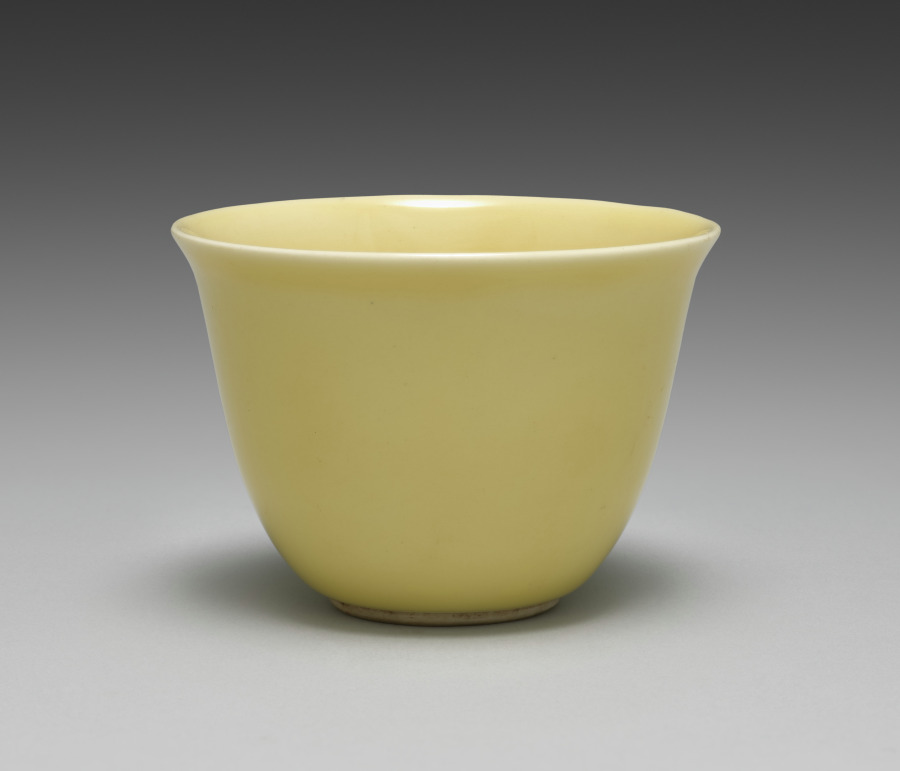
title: Cup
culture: Japan, Taishō period (1912–26) or Shōwa period (1926–89)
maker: Seifū Yohei IV (Japanese, 1872–1951)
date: 1914–46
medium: porcelain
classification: Ceramic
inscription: 清風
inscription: 清風造 【印】成山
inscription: 清風盧人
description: Like his father, Yohei IV also produced works with red or yellow monochrome glazes. His yellow-glazed works include this set of five drinking cups, a pair of sake pourers CMA 2022.216, and a sweets bowl molded into the shape of a chrysanthemum CMA 2022.218.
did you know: Seifū Yohei IV learned the ceramics industry from his father and painting from Tanomura Shosai.